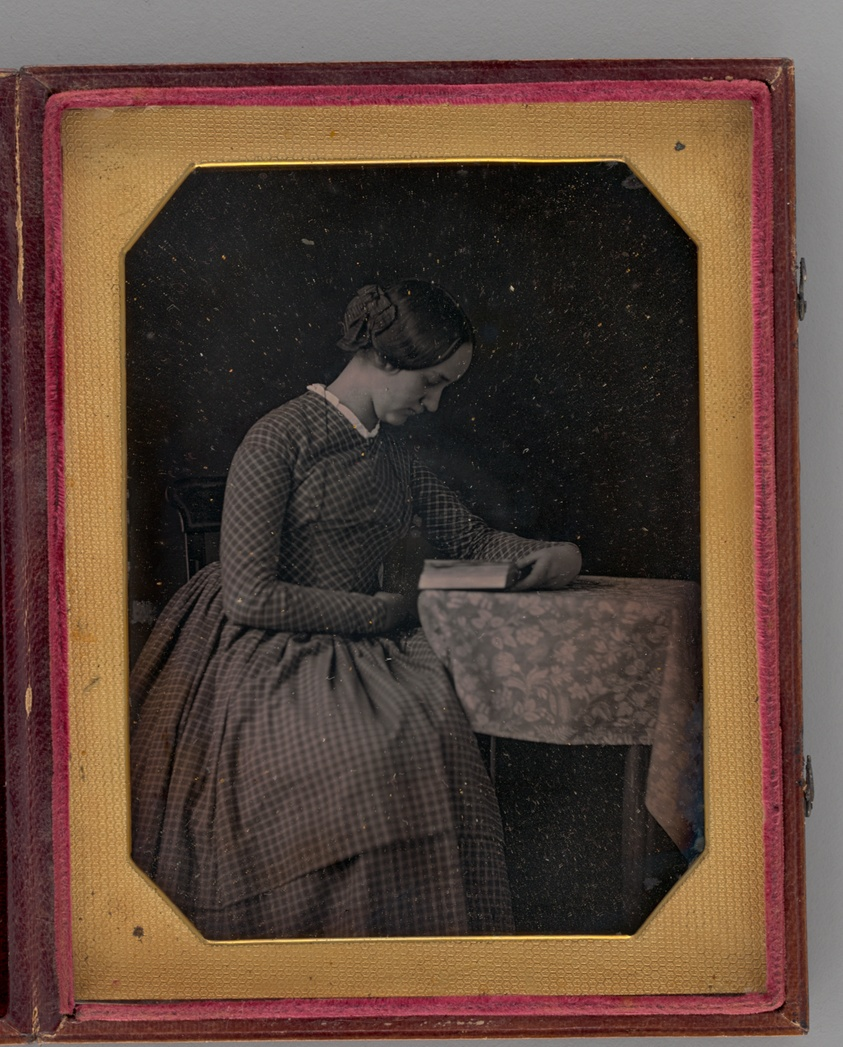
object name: Photograph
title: Untitled (Portrait of a Seated Woman, Reading)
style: 19th century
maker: Unknown maker; American, 19th century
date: 1845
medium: Daguerreotype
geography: United States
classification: portrait; photograph; photographic process; photography; portrait; daguerreotype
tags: lundberg collection, portraits, portraits: female subject, female, reading